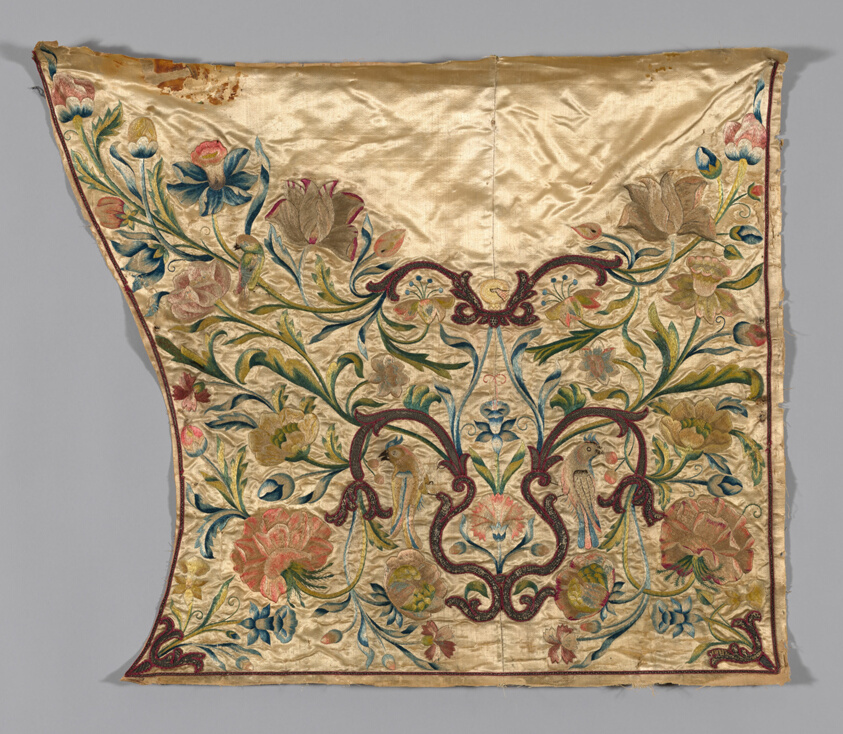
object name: Textile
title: Panel (formerly Cover from a Sedan Chair)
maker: France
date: c. 1720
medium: silk compound weave, brocaded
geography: France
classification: textile; needlework (visual works)